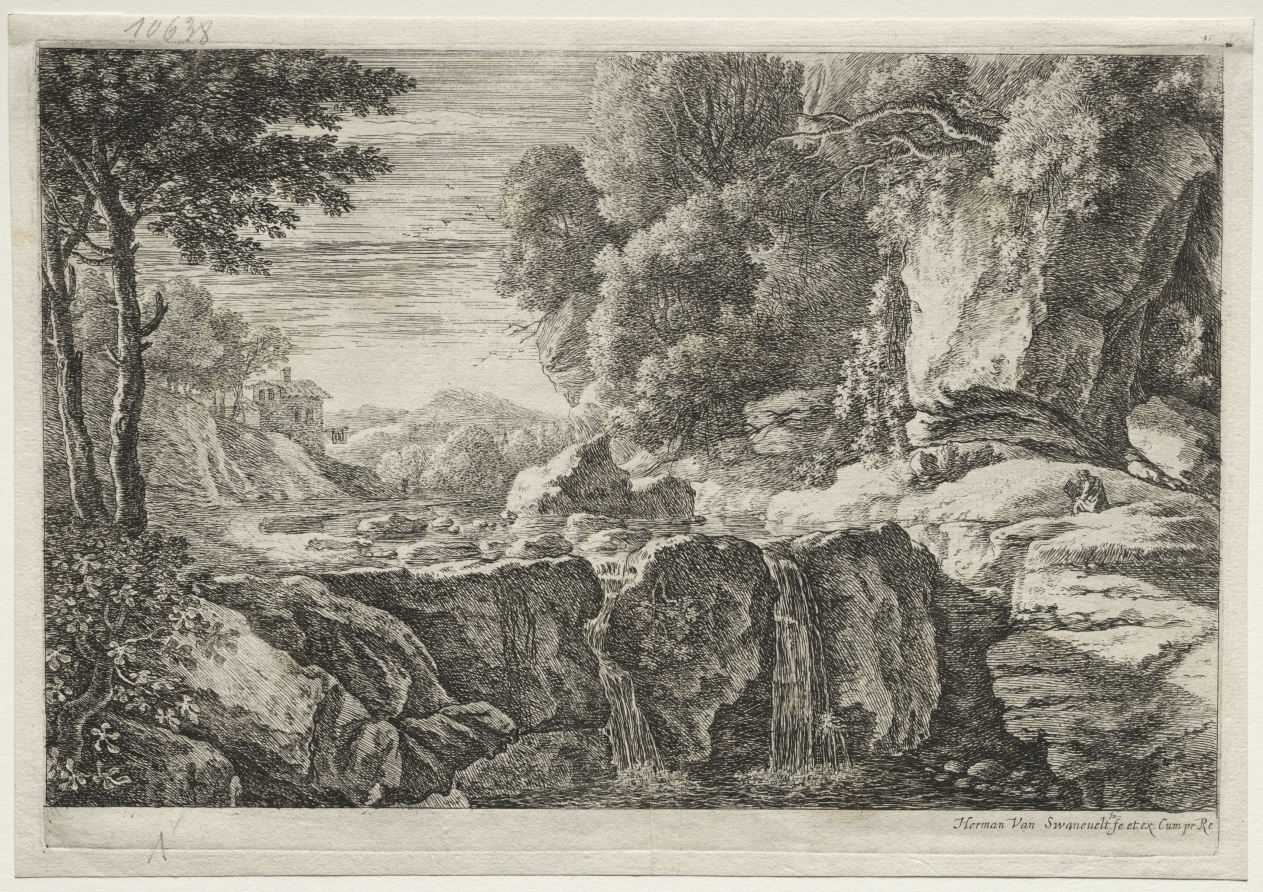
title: Four Landscapes: The Little Waterfall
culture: Netherlands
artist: Herman van Swanevelt (Dutch, c. 1600–1655)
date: 1620–55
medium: etching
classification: Print